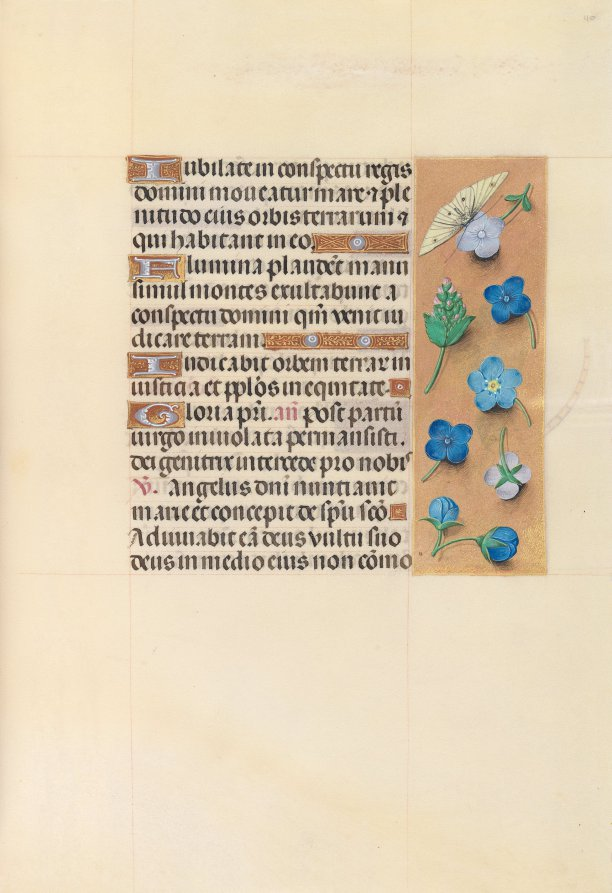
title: Hours of Queen Isabella the Catholic, Queen of Spain: Fol. 110r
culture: Flanders, Ghent and Bruges, late 15th century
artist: Master of the First Prayerbook of Maximillian (Flemish, c. 1444–1519)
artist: and Associates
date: c. 1500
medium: ink, tempera, and gold on vellum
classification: Bound Volume